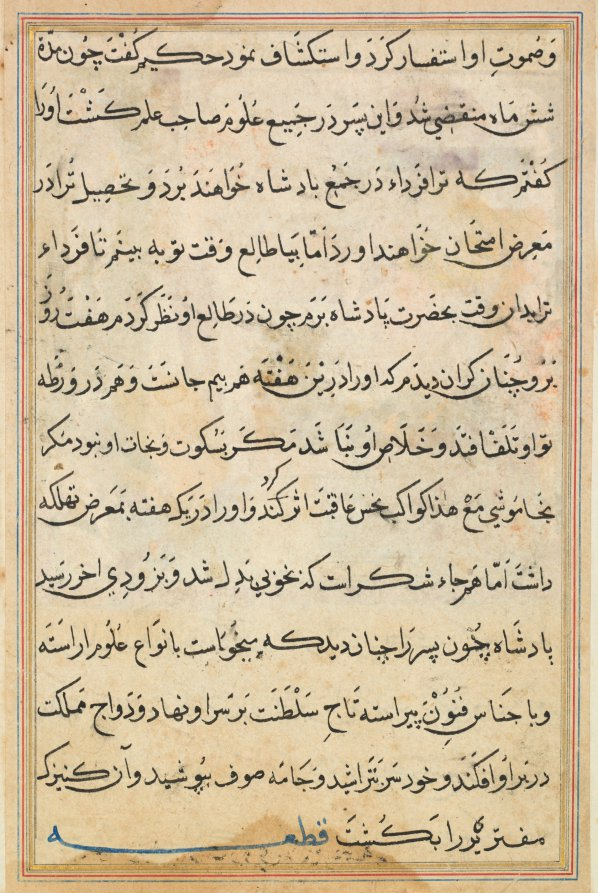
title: Page from Tales of a Parrot (Tuti-nama): text page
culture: Mughal India, court of Akbar (reigned 1556–1605)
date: c. 1560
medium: gum tempera, ink, and gold on paper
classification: Painting